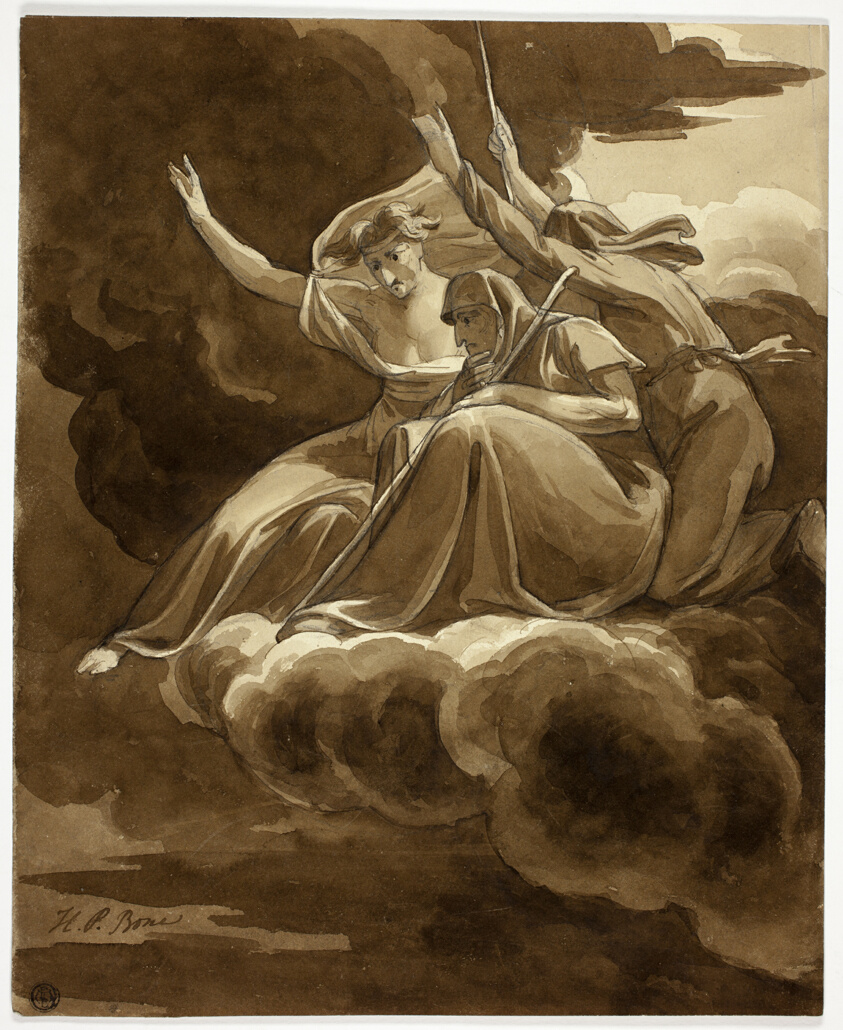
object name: Drawing and Watercolor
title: Three Witches from MacBeth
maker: Henry Pierce Bone (English, 1779-1855); or Henry Bone, R.A. (English, 1755-1834)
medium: Brush and brown wash, with pen and brown ink, over and under graphite, on cream wove paper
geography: England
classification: ink or chalk wash; brush and wash; paper; drawings (visual works); prints and drawing